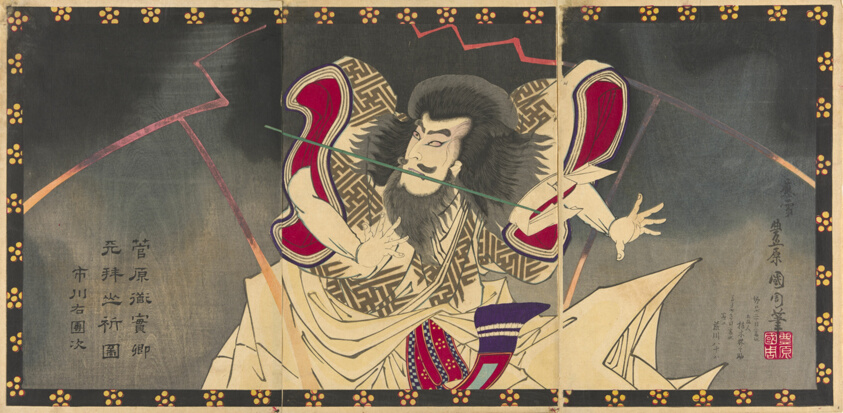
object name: Print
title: The actor Ichikawa Udanji I as Sugawara no Michizane in the play "Shinrei Sugawara Jikki," performed at the Haruki Theater in the fourth month, 1883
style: Japanese (culture or style)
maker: Toyohara Kunichika (Japanese, 1835-1900)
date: 1883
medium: Color woodblock print; oban triptych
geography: Japan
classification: woodblock print; print; asian art